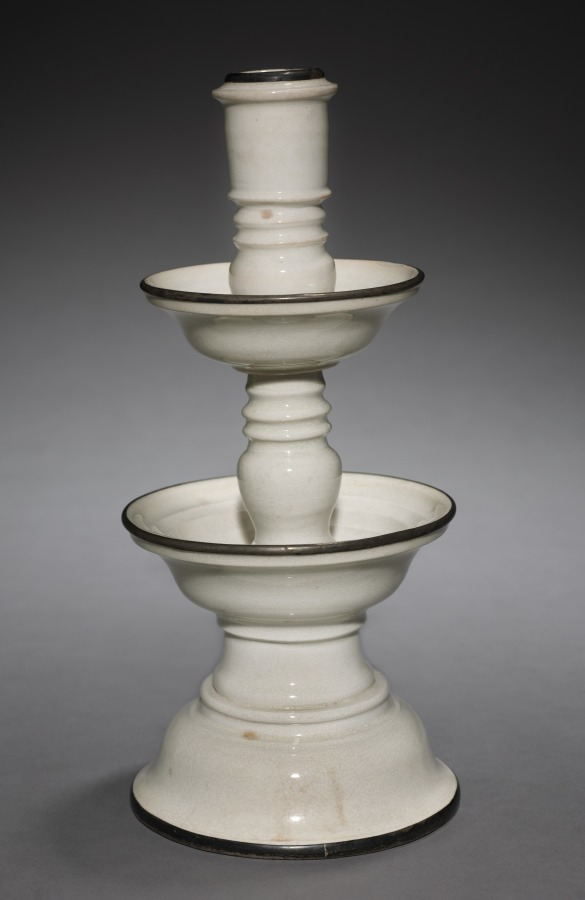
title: Candlestick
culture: China, Ming dynasty (1368–1644)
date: 1600s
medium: glazed porcelain with metal rims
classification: Ceramic